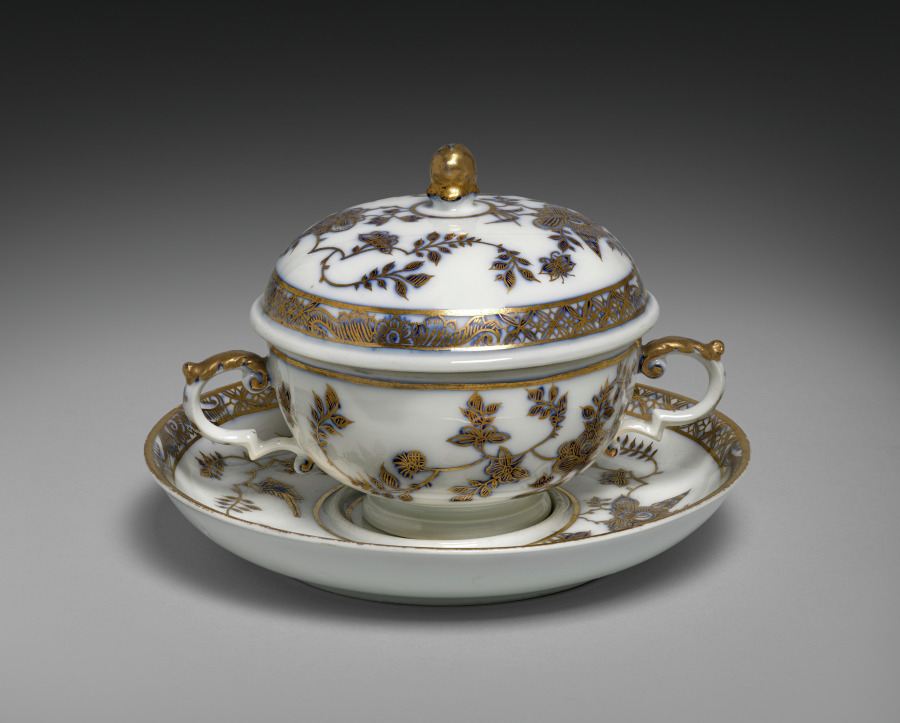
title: Covered Broth Bowl and Stand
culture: Germany, Meissen, 18th century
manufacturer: Meissen Porcelain Factory (German, est. c. 1710)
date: 1730–40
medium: gilt porcelain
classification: Ceramic